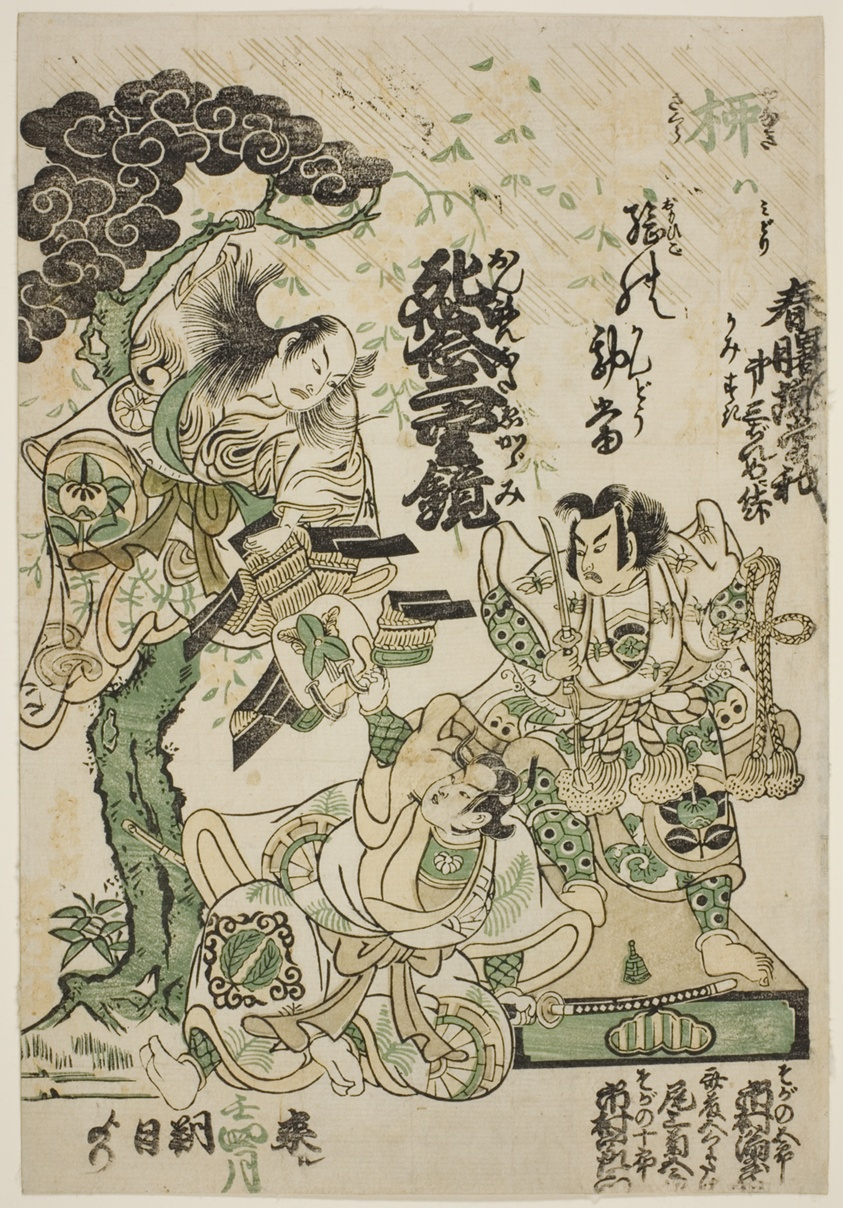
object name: Print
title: Advertisement of the drama "Haru no Akebono Kuruwa Soga," at the Ichimura Theatre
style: Japanese (culture or style)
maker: Torii Kiyomasu II (Japanese, 1706 (?)–1763 (?))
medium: Hand-colored woodblock print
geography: Japan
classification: woodblock print; print; asian art